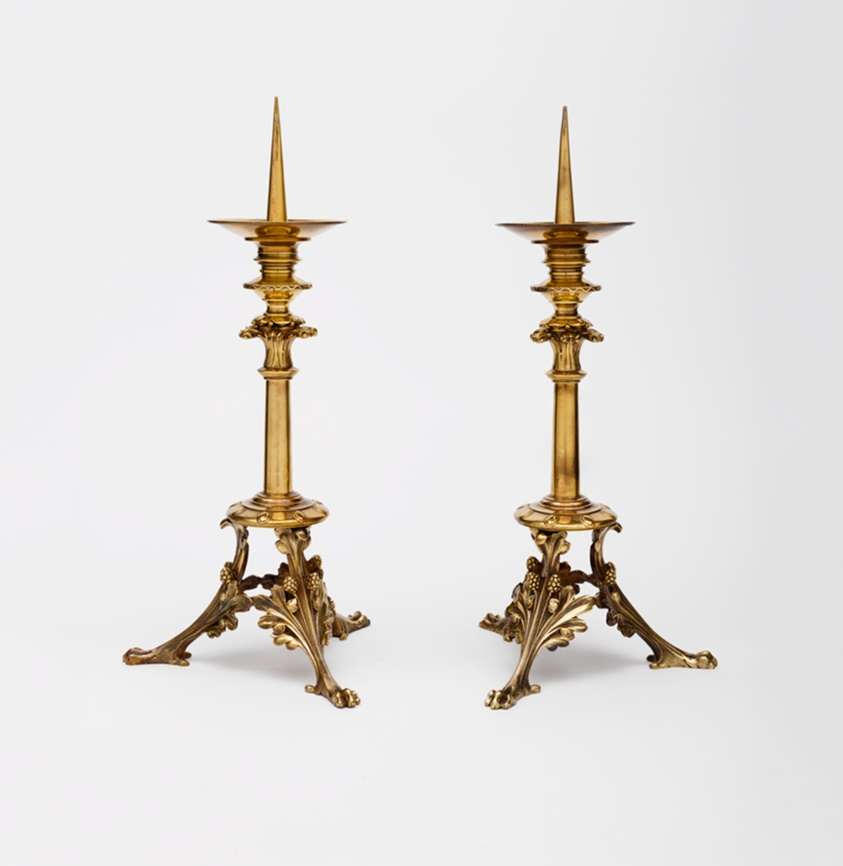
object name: Metalwork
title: Pair of Altar Candlesticks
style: gothic revival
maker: Eugène Emmanuel Viollet-le-Duc; French, 1814–1879; Made by Placide-Benoît-Marie Poussielgue-Rusand; French, 1824–1889; Paris, France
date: 1862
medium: Gilded cast bronze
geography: Paris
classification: altar candlesticks; candlesticks; candleholder; metalwork